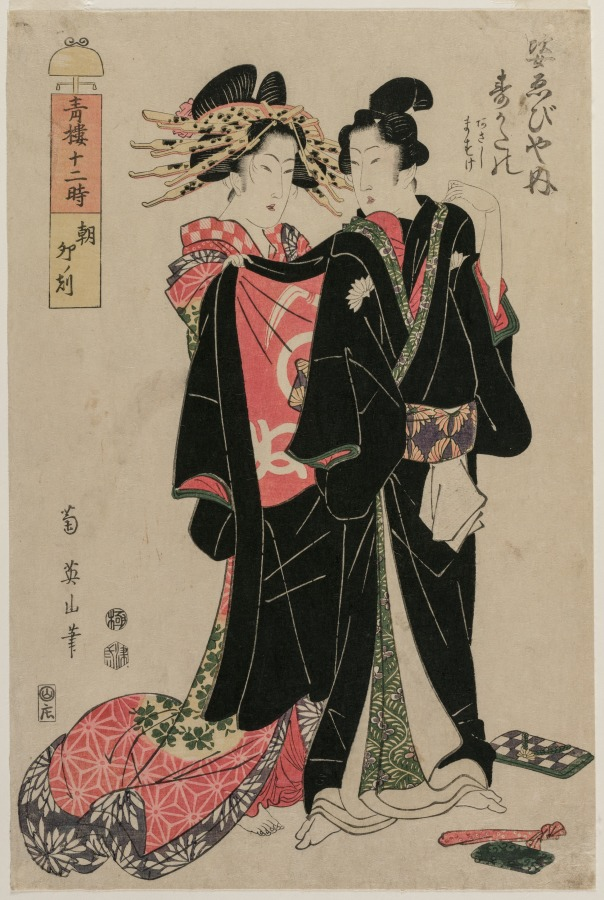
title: Sugatano of Sugata Ebisuya in the Morning, Hour of the Rabbit, from the series The Twelve Hours in the Pleasure Quarters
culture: Japan, Edo period (1615–1868)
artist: Kikukawa Eizan (Japanese, 1787–1867)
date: 1812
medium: Color woodblock print; ink and color on paper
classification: Print